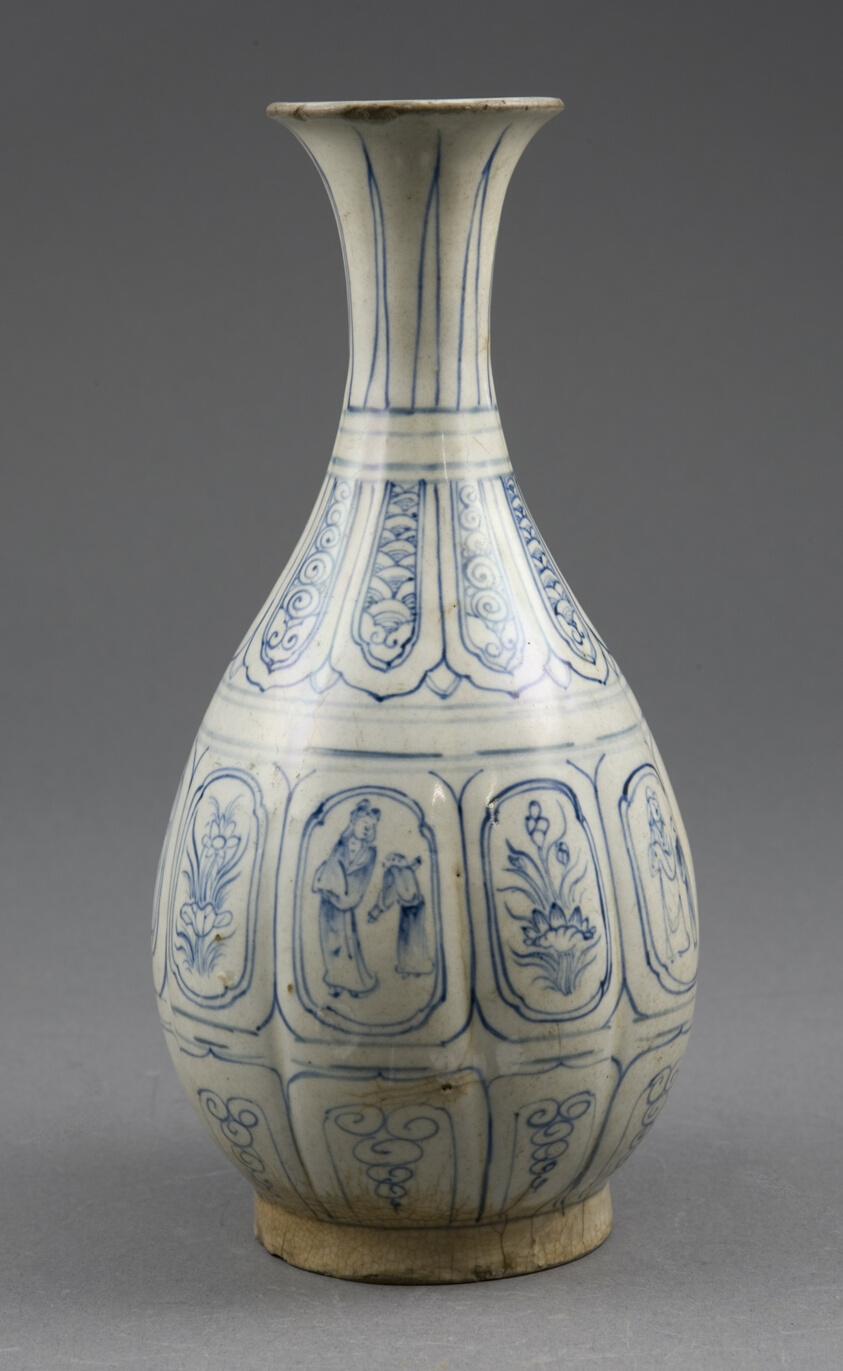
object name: Vessel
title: Pear-Shaped (Yuhuchun) Bottle with Everted Lip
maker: Vietnam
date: 15th century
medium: Stoneware with cobalt-blue underglaze and transparent gray glaze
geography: Vietnam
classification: porcelain; asian art; ceramics; vessel